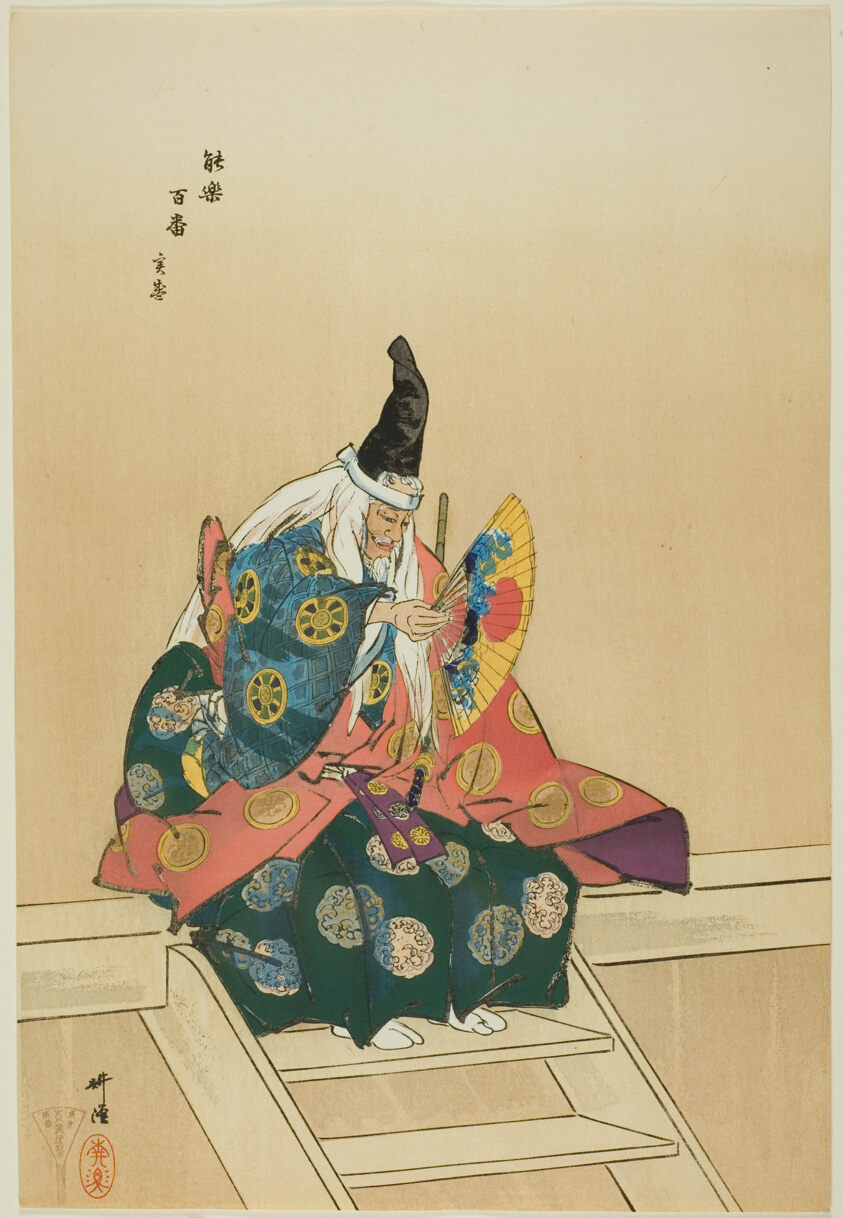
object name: Print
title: Sanemori, from the series "One Hundred No Dramas (Nogaku hyakuban)"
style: Japanese (culture or style)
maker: Tsukioka Kogyo; Japanese, 1869-1927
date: 1898/1903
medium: Color woodblock print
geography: Japan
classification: woodblock print; print; asian art